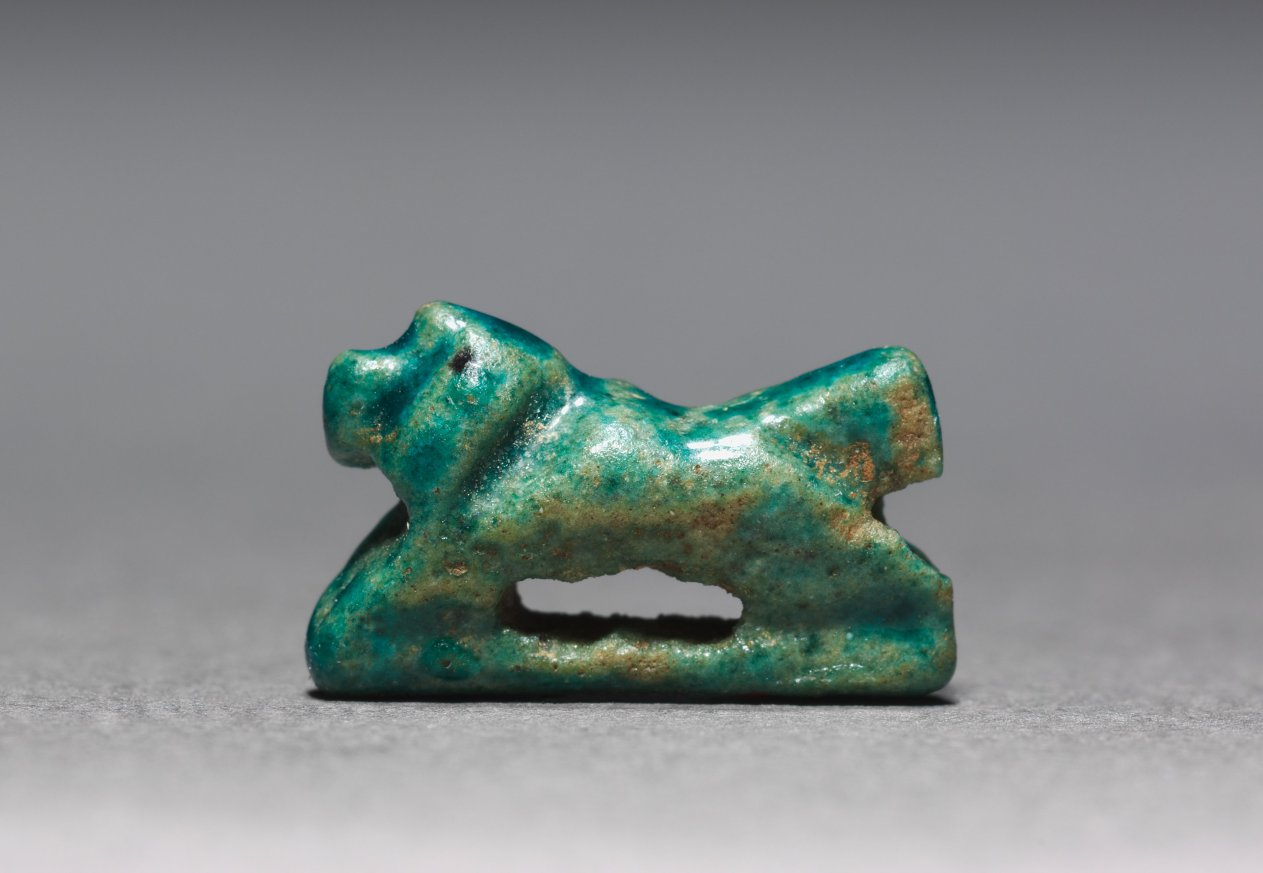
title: Amulet of a Dog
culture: Egypt, First Intermediate period (2123–2040 BCE)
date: 2123–2040 BCE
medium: turquoise green faience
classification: Amulets